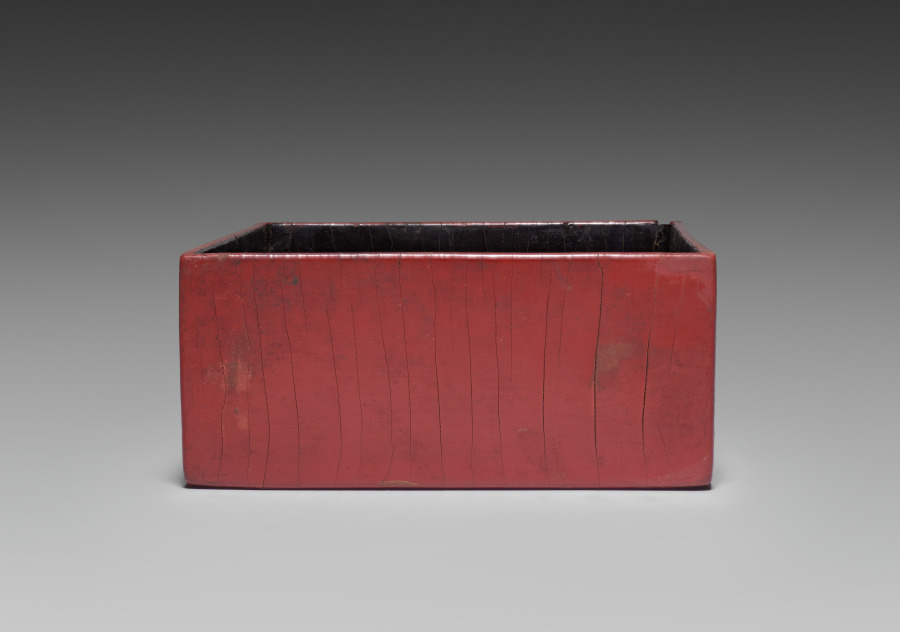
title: Drawer for a Tihong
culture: China, Ming dynasty (1368-1644), Wanli reign (1572-1620)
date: 1585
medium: carved cinnabar lacquer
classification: Lacquer